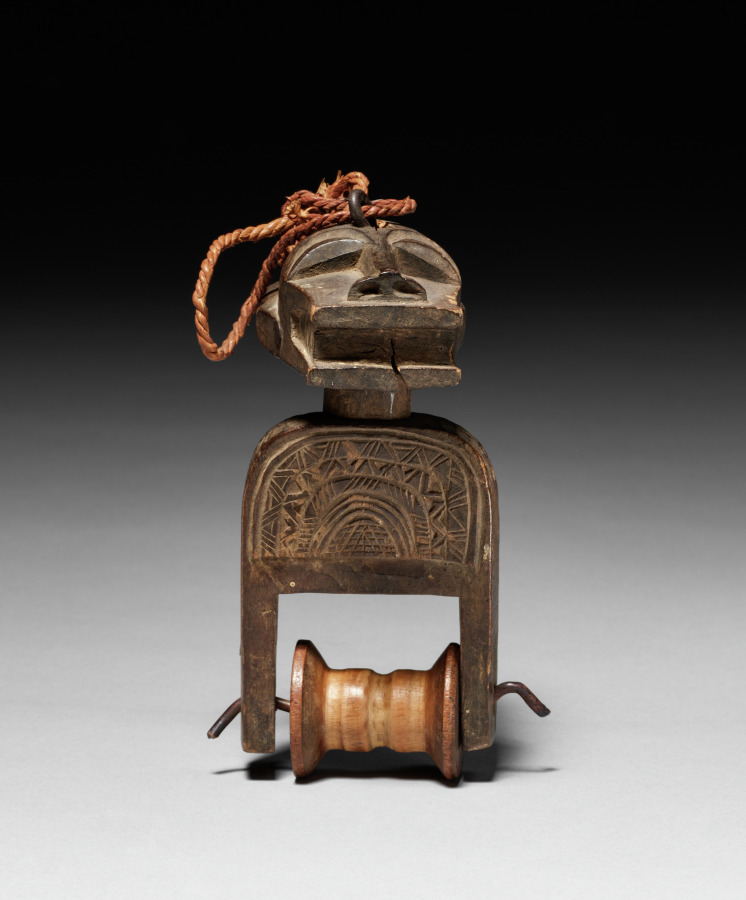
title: Heddle Pulley (Bo Nun Amuin mask)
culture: Africa, West Africa, Côte d’Ivoire, Baule-style carver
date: 1900s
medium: Wood, metal, and plant fiber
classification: Implements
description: The heddle pulley, a working element of a narrow-band loom, bears a miniature sculpture. Heddle pulleys support and separate threads during weaving. Mounted above the weaver, the pulleys allow him to glance up at an object of inspiring beauty, rather than pure functionality. This pulley depicts a face mask, a secular usage of a typically sacred mask type.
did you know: This heddle pulley depicts a fearsome Bo Nun Amuin mask that recalls nature spirits.